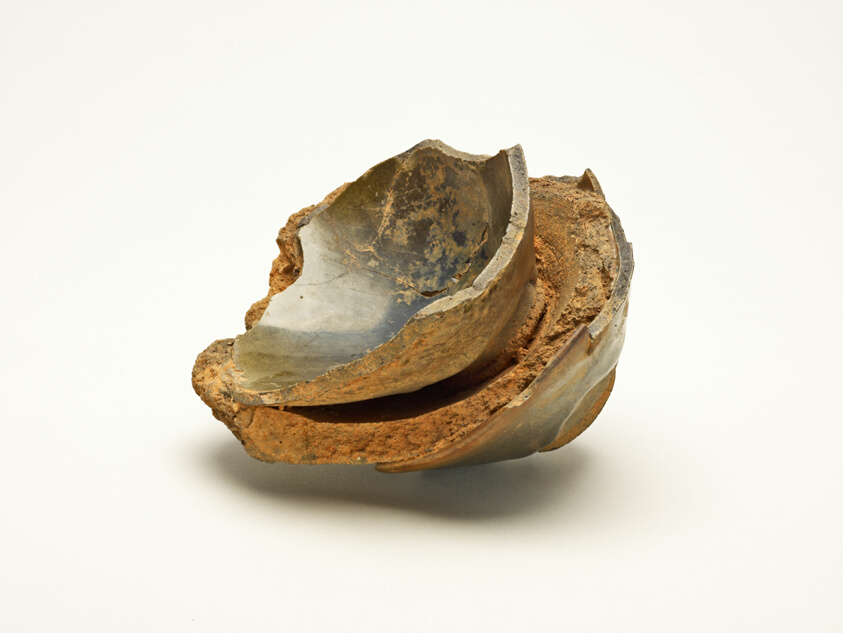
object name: Vessel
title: Fragments of Tea Bowls, fused to their saggar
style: Chinese (culture or style)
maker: China, Fujian Province, Jian ware kiln site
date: Song dynasty (960–1279), 12th/13th century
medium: Jian ware; stoneware with "hare's fur" glaze and clay firing cushion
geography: China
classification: drinking vessel; stoneware; asian art; ceramics; vessel